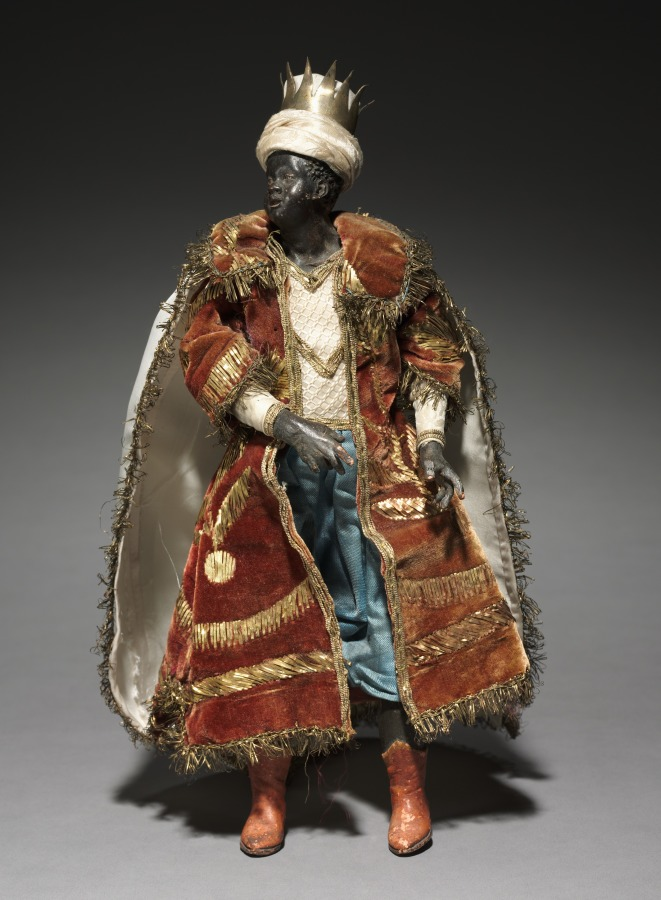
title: Figure from a Crèche: Negro Magus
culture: Italy, Naples, late 18th-early 19th century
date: 1780–1830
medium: painted wood and terracotta with various textiles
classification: Sculpture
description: The practice of creating scenes of the Nativity for the home dates from the early 1700s in Italy, where people began to set up doll-like figures of about a foot or less in height. The custom was particularly popular in Naples around 1800, where crèche scenes (crèche means cradle, or crib) included many figures, whose heads and hands of painted terracotta, stuffed cloth bodies, and clothing adapted from contemporary local costumes gave them an amazingly realistic character. Representations of the birth of Jesus can be traced to the first few centuries of Christianity. Both living creatures and sculptural depictions of them were used from early times. By the late middle ages it was customary to create life-size figures of wood or stone, naturalistically painted, to represent the characters who participated in the events of Jesus's early life. These sculptures were then arranged in scenes illustrating one or both of the most important of these events, the Adoration of the Shepherds and the Adoration of the Magi-the three kings from the East who came to pay homage to the Christ child. Used in churches, these large figures were especially popular in Italy, Central Europe, Spain, and Portugal.